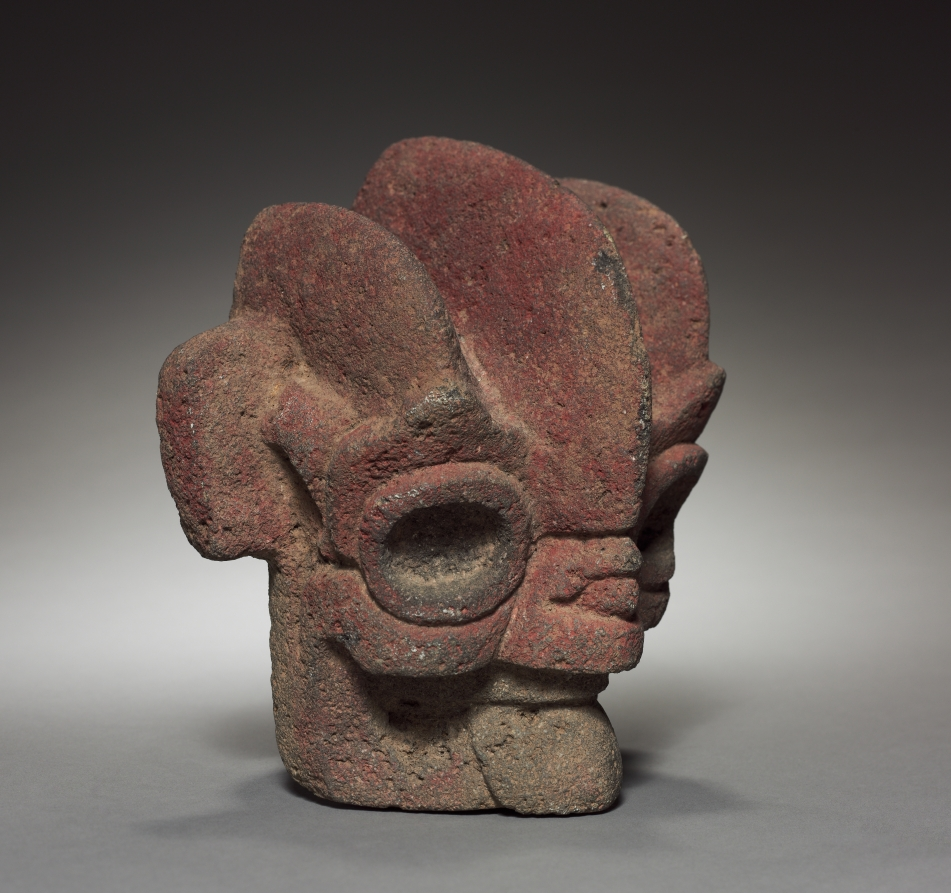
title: Head Hacha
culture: Mexico, Veracruz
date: 300–900 CE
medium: gray volcanic stone with red pigment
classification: Sculpture